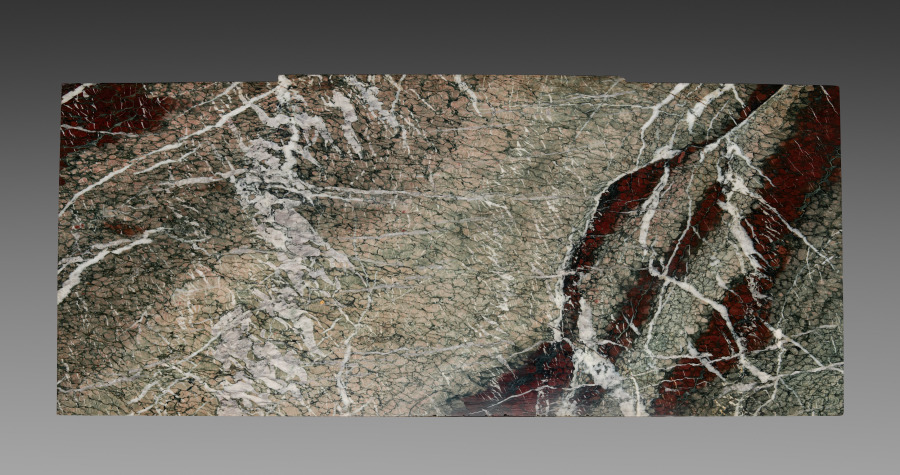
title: Marble Top for Cabinet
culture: France, late 17th Century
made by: André-Charles Boulle (French, 1642–1732)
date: c. 1690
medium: ebony, marquetry in metal and tortoiseshell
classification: Furniture and woodwork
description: Appointed cabinetmaker to King Louis XIV in 1672, André-Charles Boulle became a master of furniture making in France during the late 1600s until his death in 1732. Known primarily for his use of marquetry, in which metal patterns are inlaid into tortoiseshell then applied within the veneered surface of the furniture, Boulle established a level of quality and craftsmanship few others could achieve. As a result, his work found favor at the royal court and among other aristocrats and diplomats eager to impress the king. The inclusion of a medallion depicting Louis XIV within the bronze decoration of this chest would have identified the owner with the royal court. Often exhibiting stout architectural proportions with elegant groups of inlaid motifs such as the parrot on the central panel of this chest, Boulle’s designs are an example of the intellectual fashion for contrasting ideas, materials, and motifs.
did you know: Originally designed to sit atop an elaborate tall stand, this chest was likely altered in the late 1700s to reduce its scale and height.